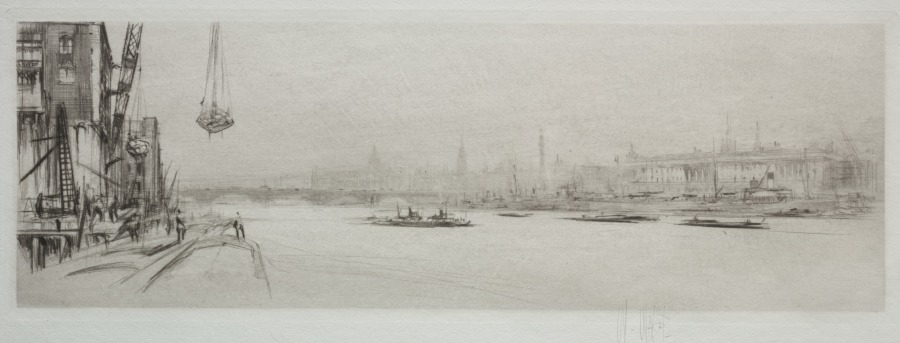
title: Arteries of Great Britain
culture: England, 20th century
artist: William Walcot (British, 1874–1943)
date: 1922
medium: drypoint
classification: Print